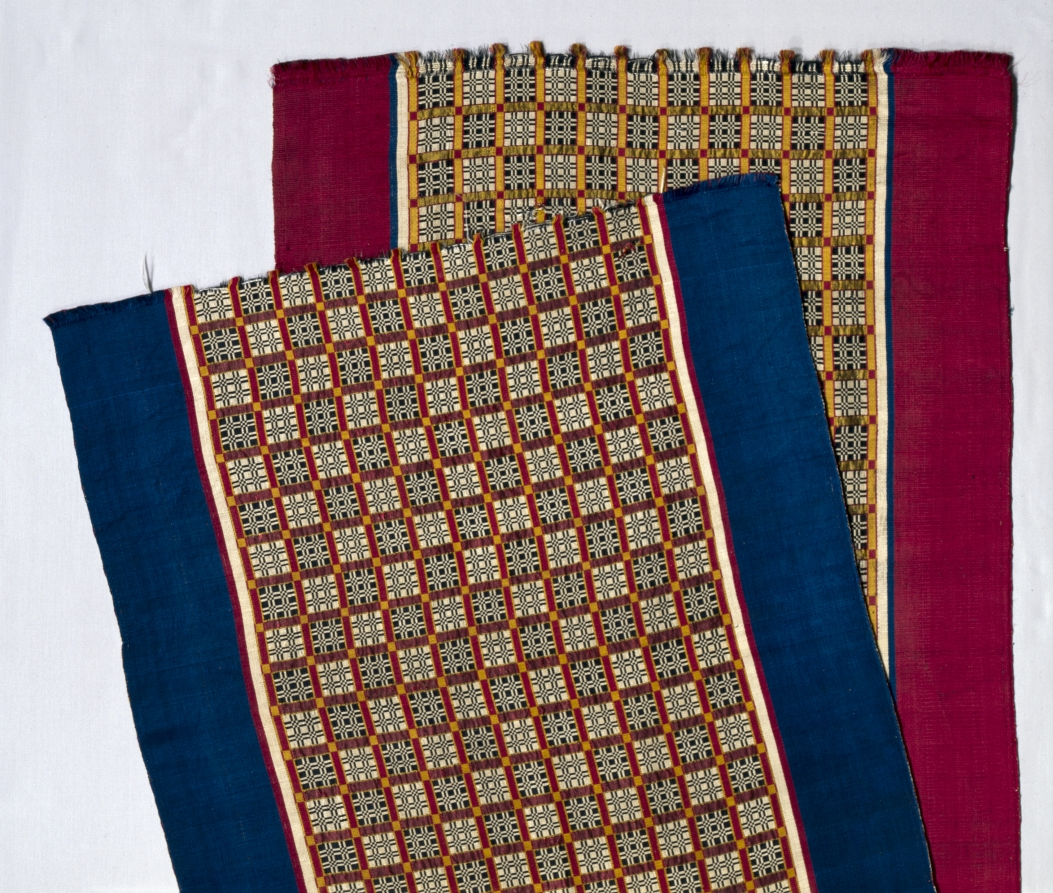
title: Wall Hanging (msimsim)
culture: Africa, North Africa, Morocco, Tétouan, Moroccan weaver(s)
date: 1800s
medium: Silk, dye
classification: Textile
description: Msimsim wall hangings were one of three standard marriage gifts (ṣdāq or mahr) from a groom to a bride in Tétouan, Morocco, as recorded by marriage contracts from 1794 to 1894. These gifts indicated the financial commitment of marriage: divorce occurred if they weren’t promptly received! This msimsim was made from silk harvested in Tétouan, or from raw Asian silk imported via Marseille. Its traditional design is a double-sided gridded brocade (raised woven pattern), navy on one side, crimson on the other. When this was woven, at least 25 professional silk workshops flourished in Tétouan, producing bridal gifts and other goods that outsold European imports.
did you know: Some scholars believe these checkerboard fabrics were traded, and eventually influenced patterns in some West African strip woven textiles.